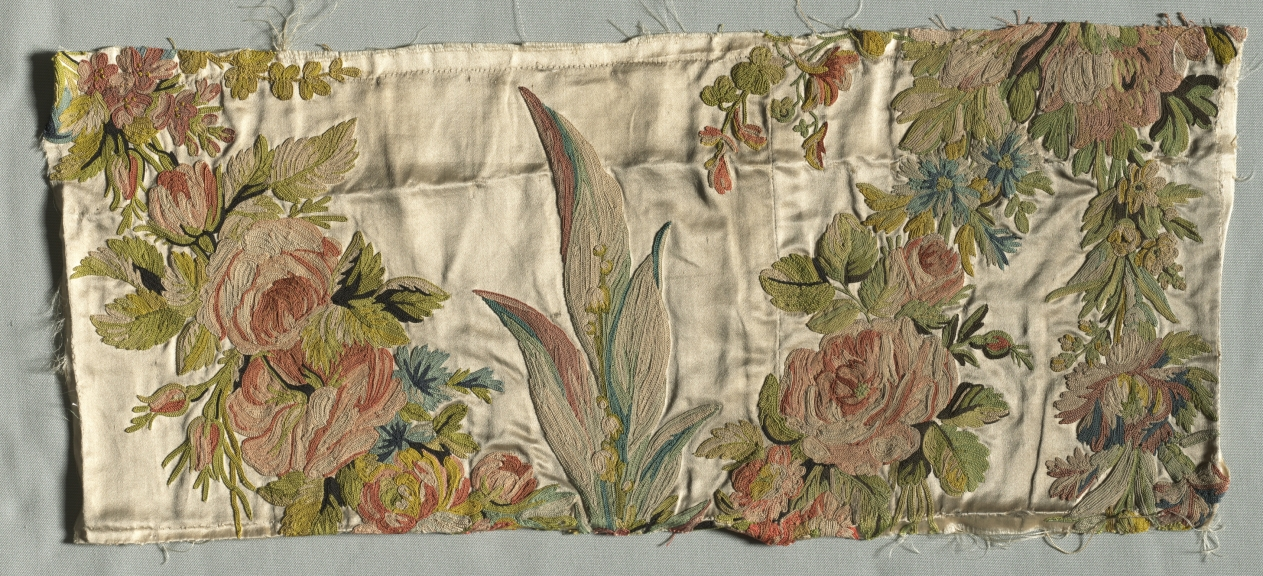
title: Coverlet Fragment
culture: France, 18th Century, period of Louis XVI (1774-1793)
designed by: Philippe de Lasalle (French, 1723–1805)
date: c. 1760–1770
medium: embroidered satin and silk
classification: Textile